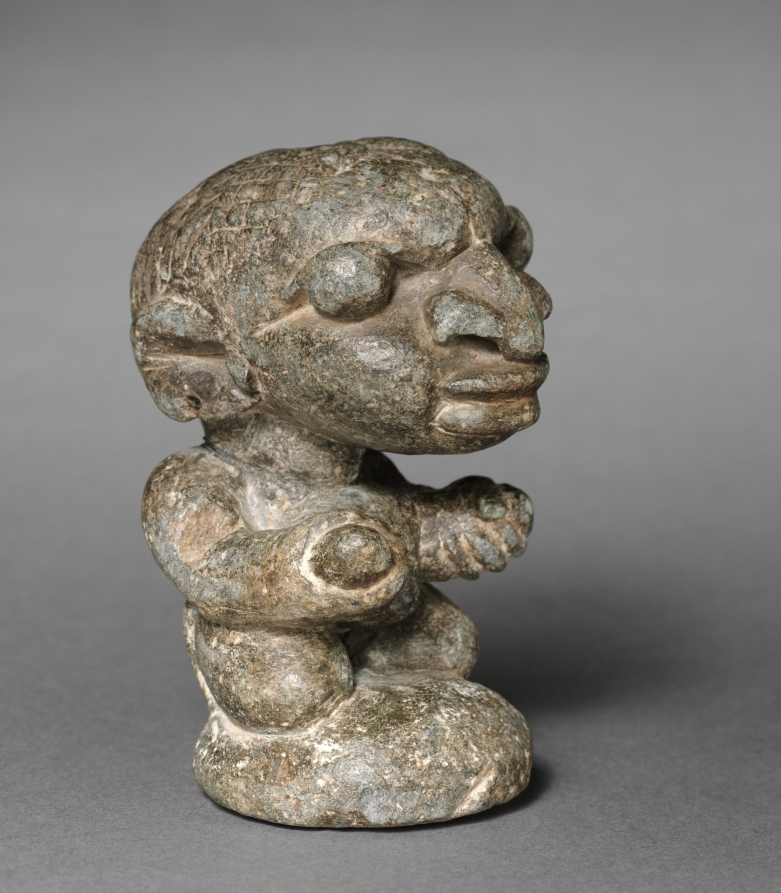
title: Female Figure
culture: Africa, West Africa, Sierra Leone, Sherbro-style maker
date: 1500s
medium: soapstone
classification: Sculpture